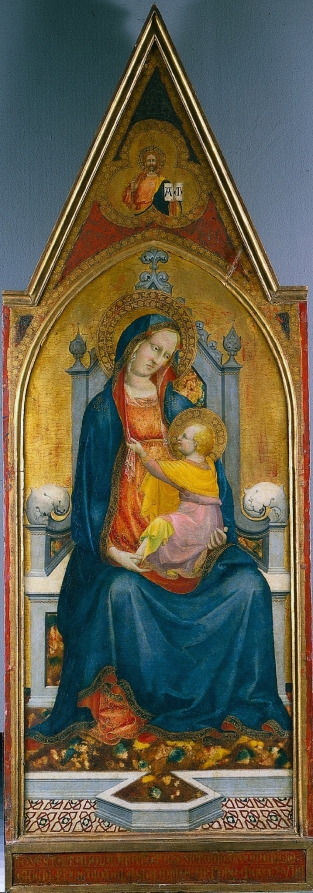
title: Virgin and Child Enthroned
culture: Italy, Tuscany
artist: Battista di Biagio Sanguigni (Italian, active 1393–1451)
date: 1419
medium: tempera and gold on wood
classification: Painting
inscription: Inscribed at bottom: "QUESTA TAVOLA AFATO FARE ANTONIO DI DOMENICHO / GIUGNI P[ER] RIMEDIO DELA SUA ANIMA ANI DNO. MCCCCXVIIII"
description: Rather than depicting a single moment in time, this gold-ground painting symbolically encapsulates Christ. Seated on a rich throne, the monumental Virgin holds the Christ child. Above, the risen Christ is seen in heaven holding a book, inscribed with the alpha and omega, the first and last letters of the Greek alphabet, signifying Christ’s role as the beginning and end of all things. The Italian inscription states: "This painting was made for Antonio di Domenicho Giugni for the repose of his soul, the year of our Lord 1419." In the 1300s, Italian painting focused on the heavenly aspects of Christian faith in order to convey abstract religious concepts. Depicted as specimens of formal beauty, sacred figures were placed against an ethereal gold background. Within a hundred years, artists began to highlight the earthly aspects of sacred figures, placing them within naturalistic landscapes. In this newer style of painting, the approachability of sacred figures fostered devotion among the faithful.